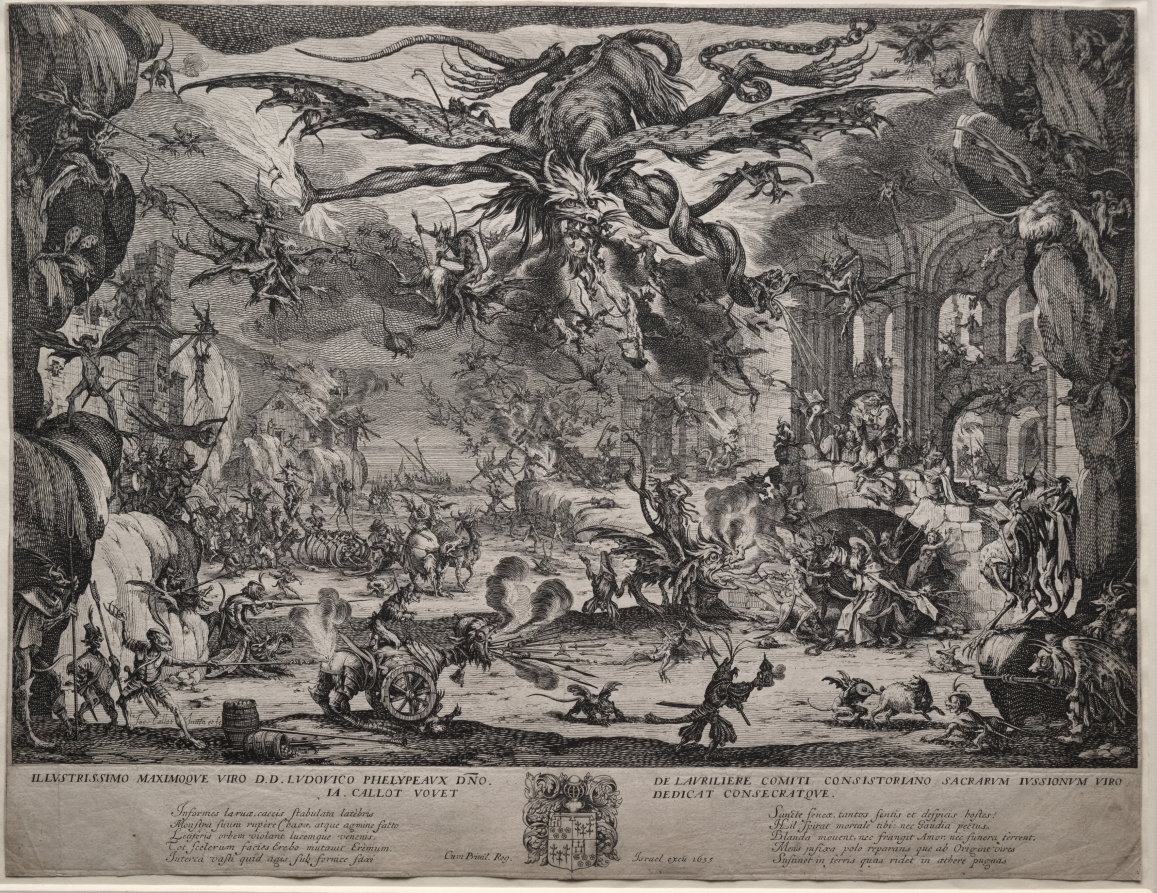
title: The Temptation of Saint Anthony (second version)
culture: France, 17th century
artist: Jacques Callot (French, 1592–1635)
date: 1635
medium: etching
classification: Print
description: The Witches' Sabbath was said to be the meeting of sinister forces for devil worship through dancing, feasting, or sacrifices. In depicting this orgy of bodies and monsters, artists often borrowed from religious imagery. Numerous Renaissance images provided Jacques Callot with a litany of fantastic creatures for his widely influential Temptation of Saint Anthony, depicting the steadfast saint as he endures the mental and spiritual tortures of hell.